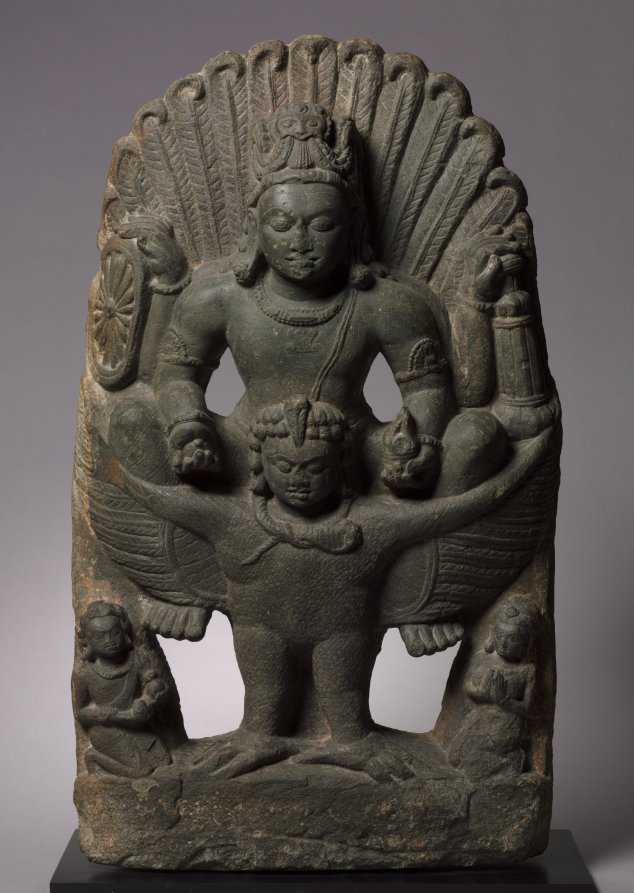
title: Vishnu Riding on Garuda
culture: Eastern India, Bihar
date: 300s CE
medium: schist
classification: Sculpture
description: In a rare and powerful work from this period, Vishnu straddles his vehicle, the man-eagle called Garuda, here shown with a human head, wings outstretched, and tail feathers expanding like rays of light behind the head of the god. Garuda is the enemy of serpents, and a subjugated serpent is tied around his neck. His determined expression lends confidence that he will do anything in his power to support Vishnu in his accomplishments. Tiny worshippers kneel in veneration before the imposing figures. Each of Vishnu's hands holds an implement: discus, mace, conch, and citron fruit. On his chest is an auspicious symbol called the shrivatsa, or "child" (vatsa) of Shri, the goddess of good fortune and a wife of Vishnu.